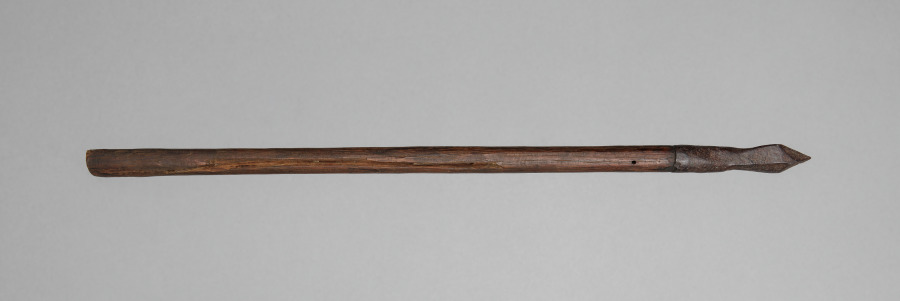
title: Crossbow Bolt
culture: Germany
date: 1500s-1600s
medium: wood, leather, steel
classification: Arms and Armor